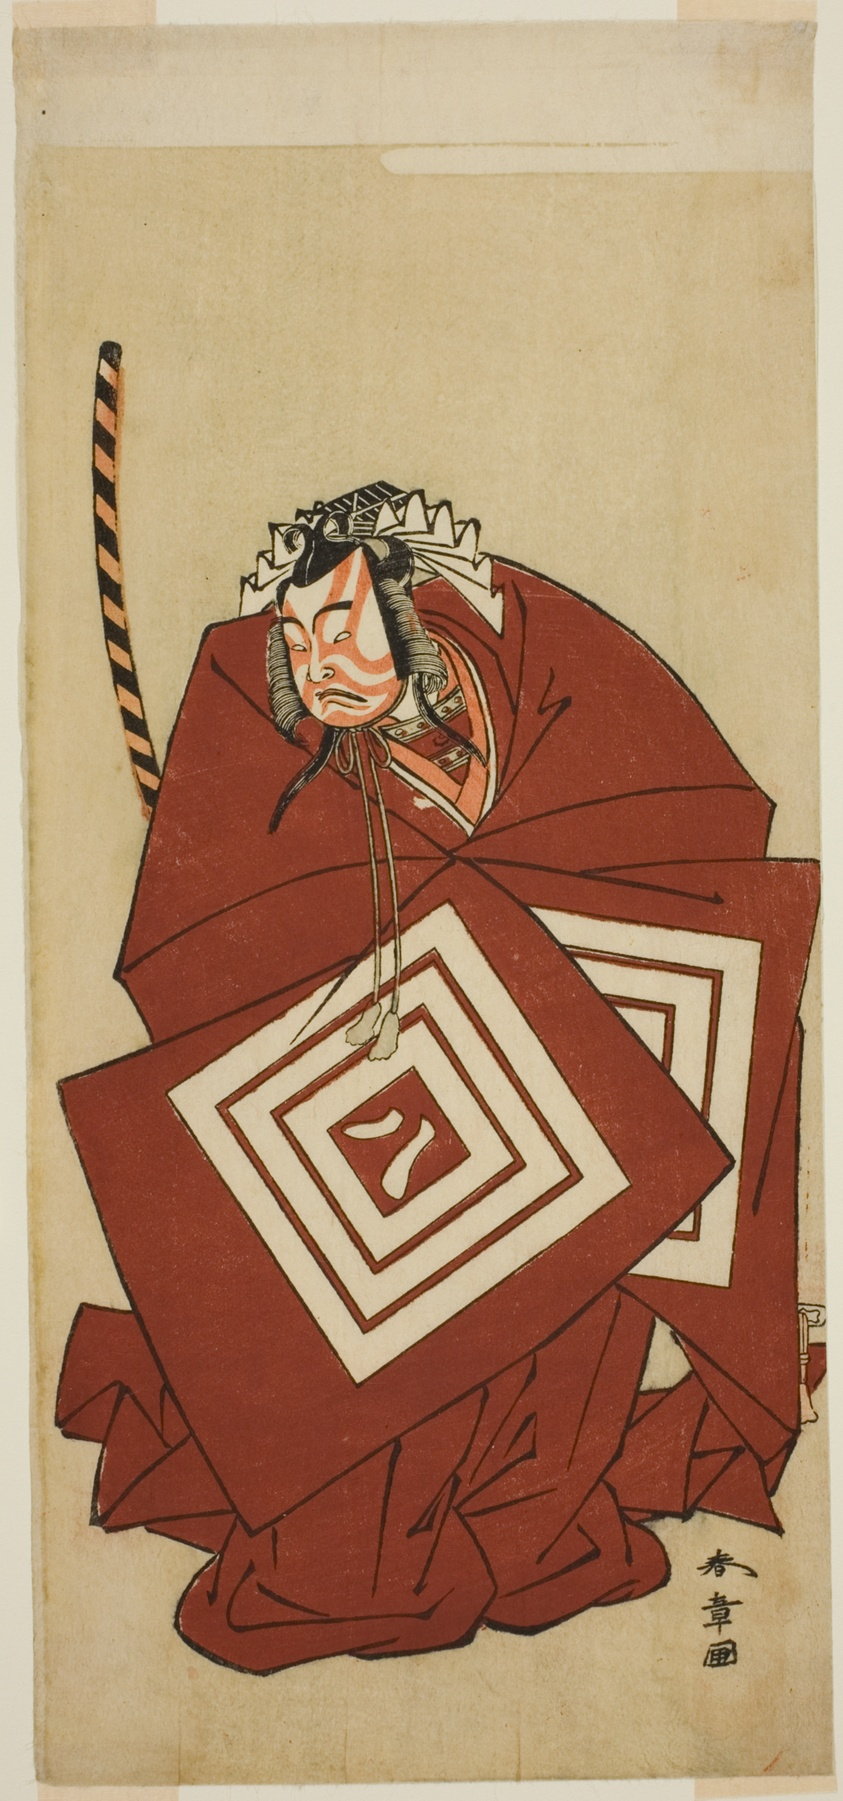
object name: Print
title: The Actor Ichikawa Yaozo II as Hachio-maru Aratora in the Play Chigo Sakura Jusan Kane, Performed at the Ichimura Theater in the Eleventh Month, 1774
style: Japanese (culture or style)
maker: Katsukawa Shunsho 勝川 春章; Japanese, 1726-1792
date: c. 1774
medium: Color woodblock print; hosoban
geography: Japan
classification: woodblock print; print; asian art